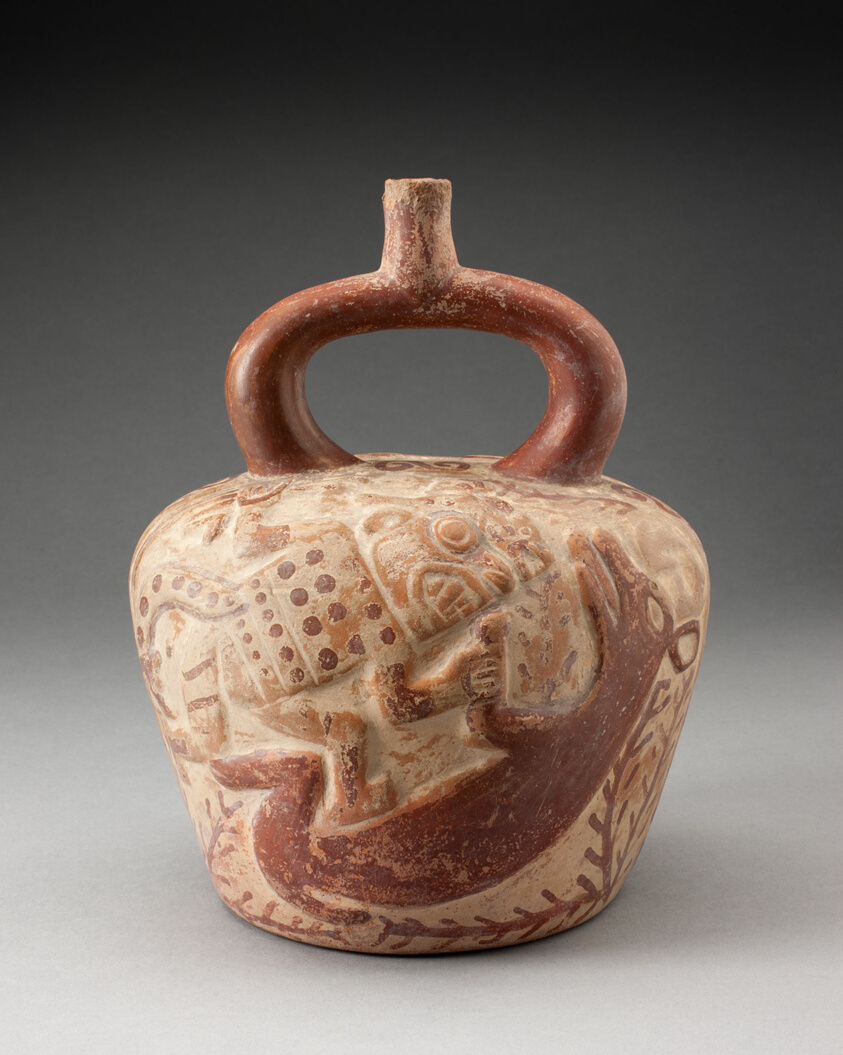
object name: Vessel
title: Stirrup Spout Vessel with Raised Deer Hunt Motifs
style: moche, Arts of the Americas, andes, south american, andean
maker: Moche (North coast, Peru)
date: 100 BCE–500 CE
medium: Ceramic and pigment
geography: Peruvian North Coast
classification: earthenware; ceramics; vessel; art of the americas